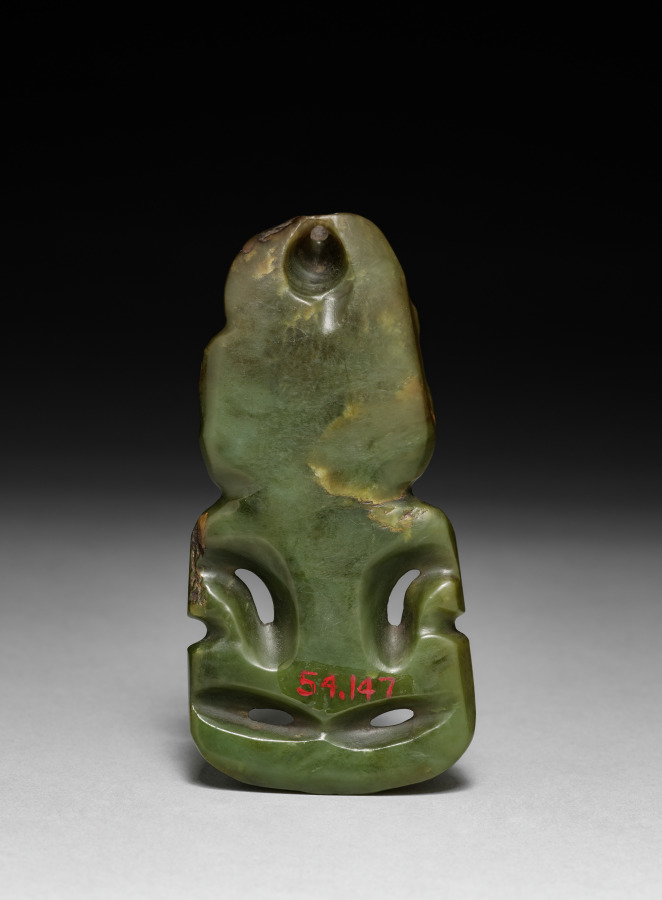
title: Pendant (Hei-tiki)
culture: Polynesia, New Zealand, Maori people, 19th century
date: 1800s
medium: nephrite (greenstone)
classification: Sculpture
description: Among the Māori, leaders are hereditary and imbued with mana, power and prestige that can be embodied and passed down in the artworks associated with them. Hei-tiki are among these treasured, mana-charged heirlooms, which connect the living to ancestors of the islands’ pre-European past. They may represent Hine-te-Iwaiwa, a legendary ancestress who is the exemplar of Māori womanhood and the patron of childbirth.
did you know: Hei-tiki may represent Hine-te-Iwaiwa, a legendary ancestress who is the exemplar of Māori womanhood.